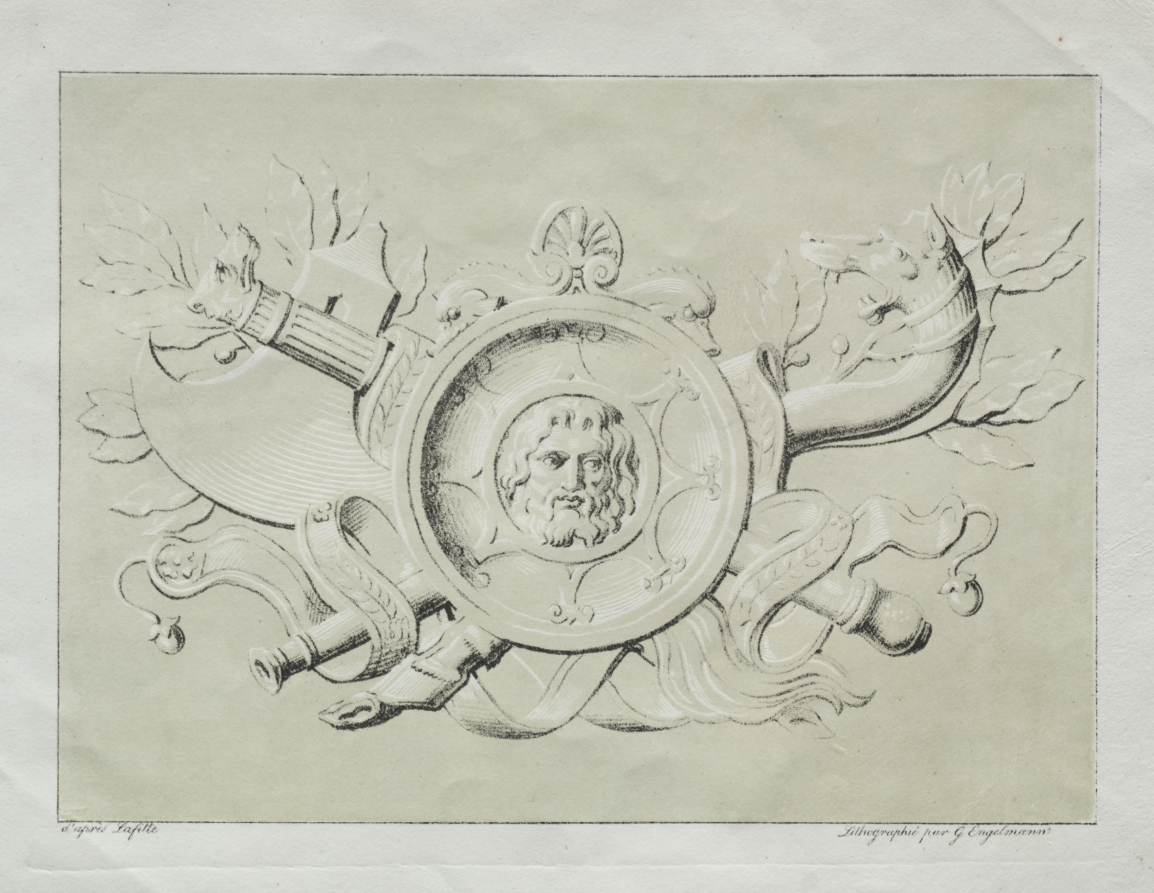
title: Receuil d'essais lithographiques: Un trophee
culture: France, 19th century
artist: Godefroy Engelmann (French, 1788–1839)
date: c. 1816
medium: lithograph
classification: Bound Volume